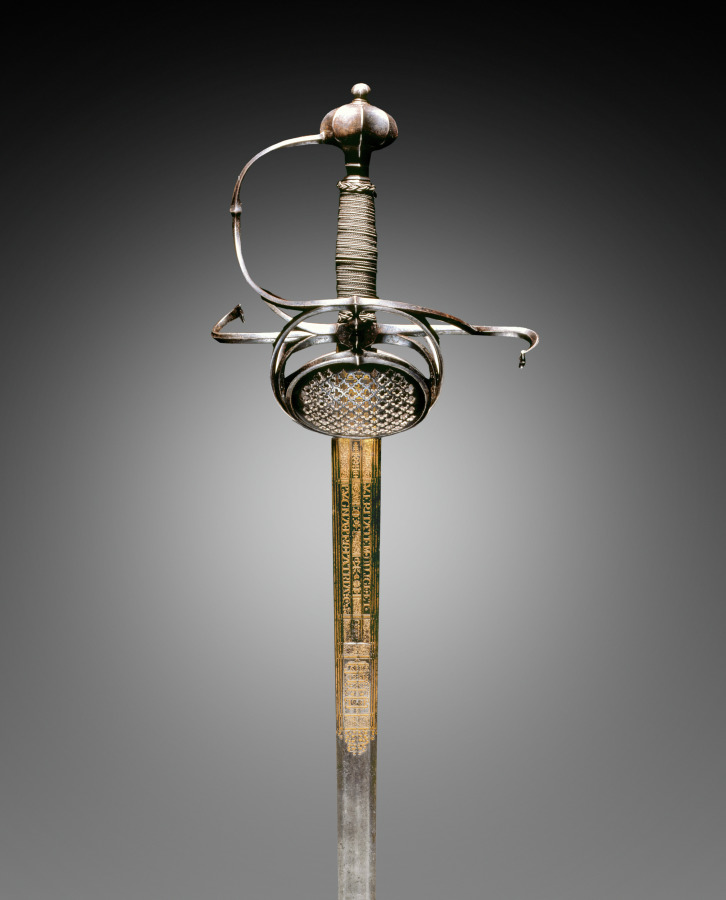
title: Rapier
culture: Germany, Solingen, 17th century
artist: Clemens Horn (German, 1586–1617)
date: c. 1620–30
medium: steel, blued and gilded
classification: Arms and Armor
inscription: NEC TEMPARE NEC TIMIDE / INTER ARMA SILENT LEGE / VERITATEM DILIGE ET PUGNA PRO PATRIA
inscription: Unicorn Head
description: This weapon has an especially handsome configuration of hilt, pommel, quillons, and guard. The blade is also very finely wrought and bears the mark (a unicorn head) of the German swordsmith, Clemens Horn, of Solingen, a town near Düsseldorf. The Latin inscription on the blade reads in translation: "Neither without cause, nor fearfully/Between arms and silent law/ Prize truth and the fight for one's country."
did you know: The "Pappenheimer" hilt seen here is named after Count Pappenheimer (1594-1632) who popularized the style which offered more protection to the hand with its large pierced plates.